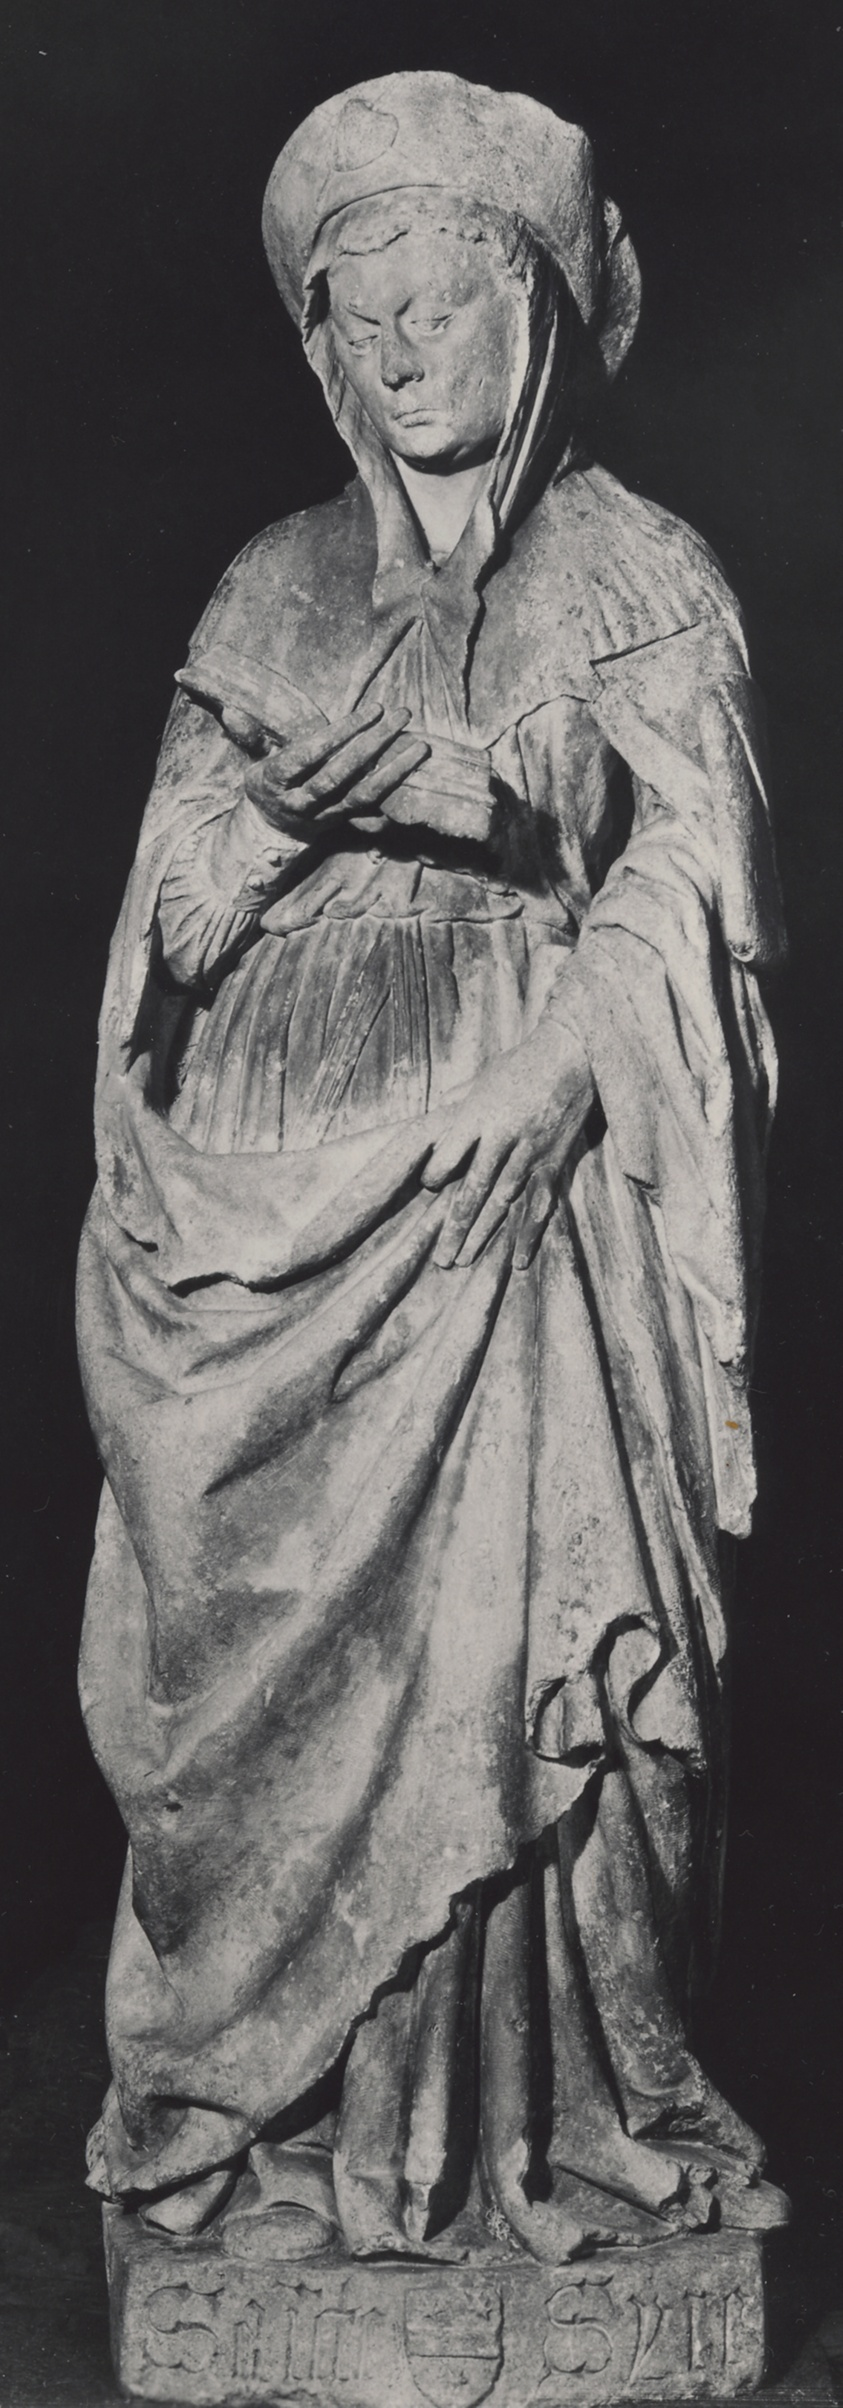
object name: Sculpture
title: Saint Syra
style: sixteenth century, 16th Century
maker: French; Troyes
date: 1525-50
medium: Limestone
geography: France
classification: large scale; sculpture; french; limestone; sculpture/stone; stone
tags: saints, book, Christian subjects, Christianity, Devotion, religion, religious, religious figures, woman